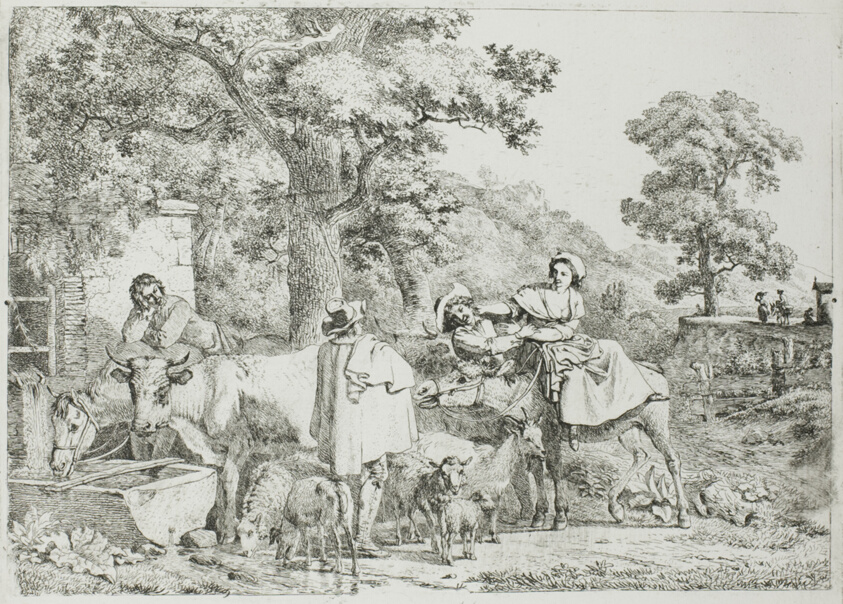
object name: Print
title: Cow and Horse at the Trough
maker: Jean Louis Demarne; French, born Belgium, 1744-1829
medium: Etching in black on ivory wove paper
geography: France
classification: etching; print; prints and drawing